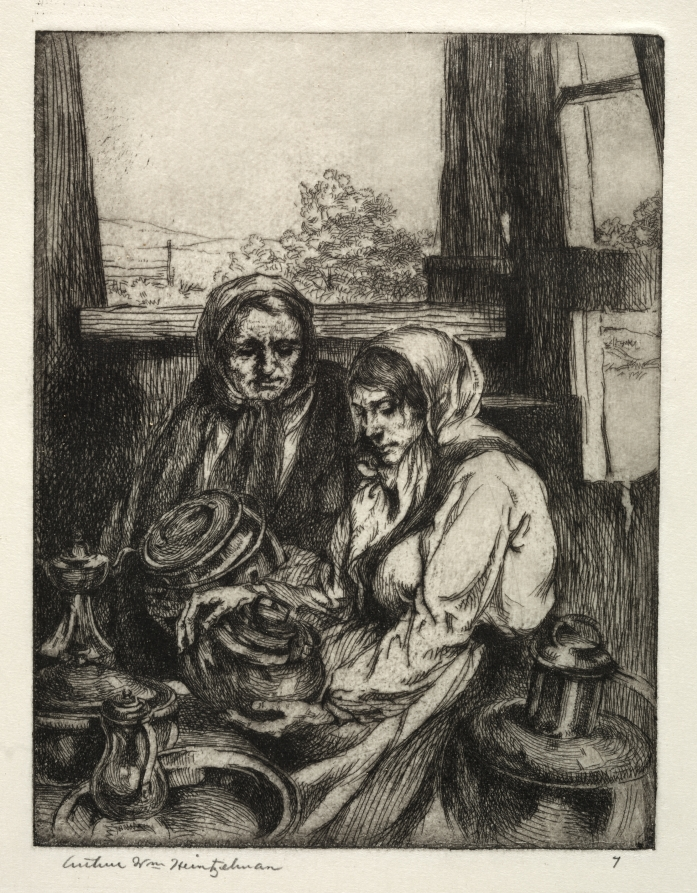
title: Old Brass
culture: America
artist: Arthur William Heintzelman (American, 1891–1965)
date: 1919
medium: etching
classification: Print